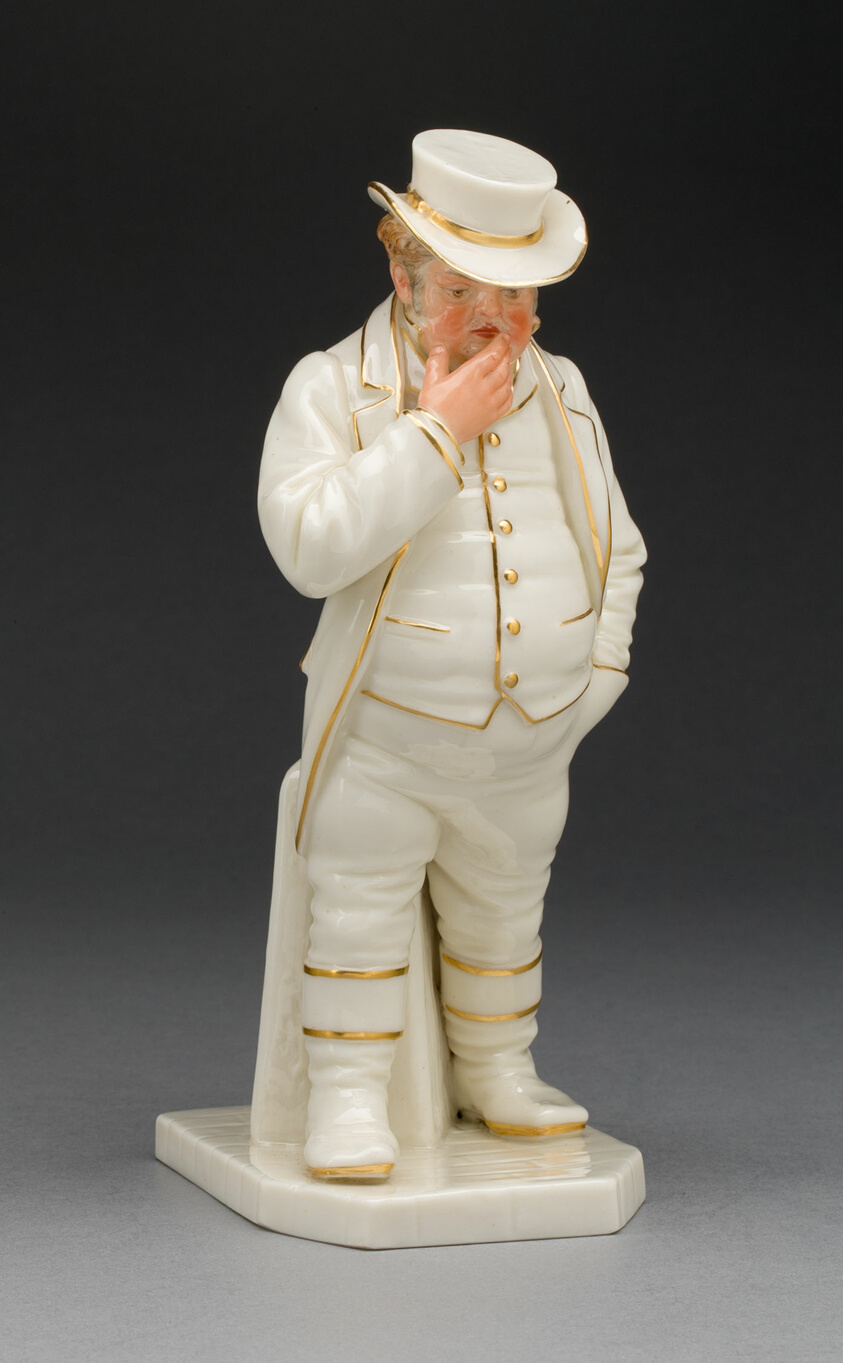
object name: Ceramics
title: Figure of John Bull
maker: Worcester Porcelain Factory (Worcester Royal Porcelain Company, 1862-1958); Worcester, England, founded 1751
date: May 25, 1881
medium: Soft-paste porcelain with gilding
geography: Worcester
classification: sculpture; porcelain; european decorative arts; ceramics